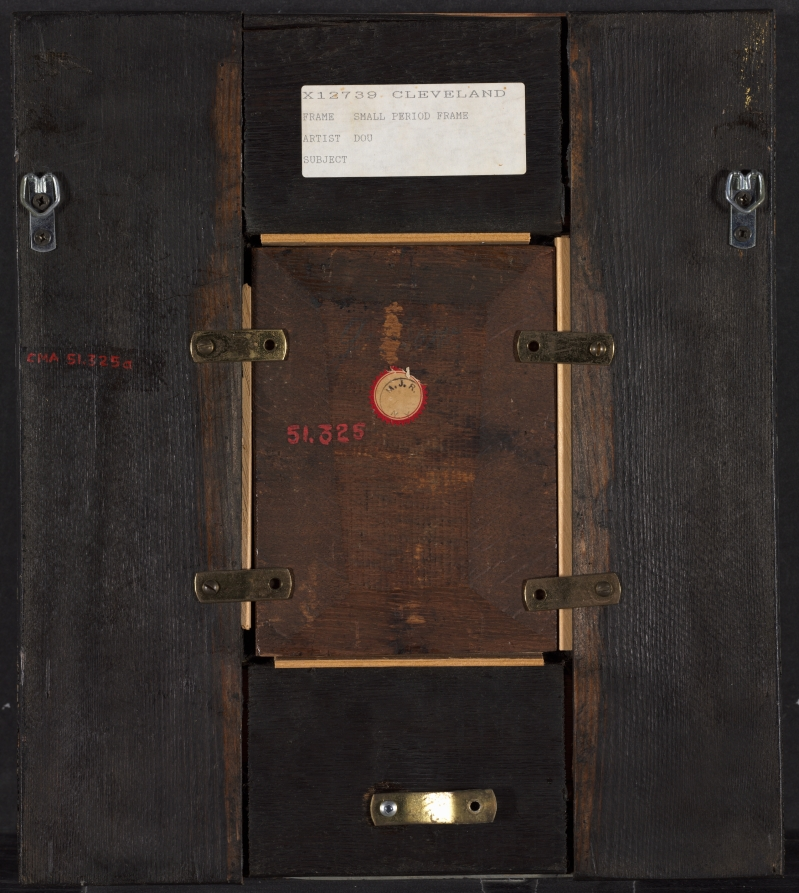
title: A Young Woman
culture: Netherlands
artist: Gerrit Dou (Dutch, 1613–1675)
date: 1640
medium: oil on wood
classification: Painting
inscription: Signed left center: "GDov."; "[GD in monogram]"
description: This painting may depict a specific person as in a traditional portrait. The less formal costume and the tight focus on the head, however, may mean that it is a tronie, a popular category of painting among Dutch painters in the 1600s. While painted from living models, tronies represent more general types of people, designed as beautiful images rather than accurate likenesses of people known to their patrons.